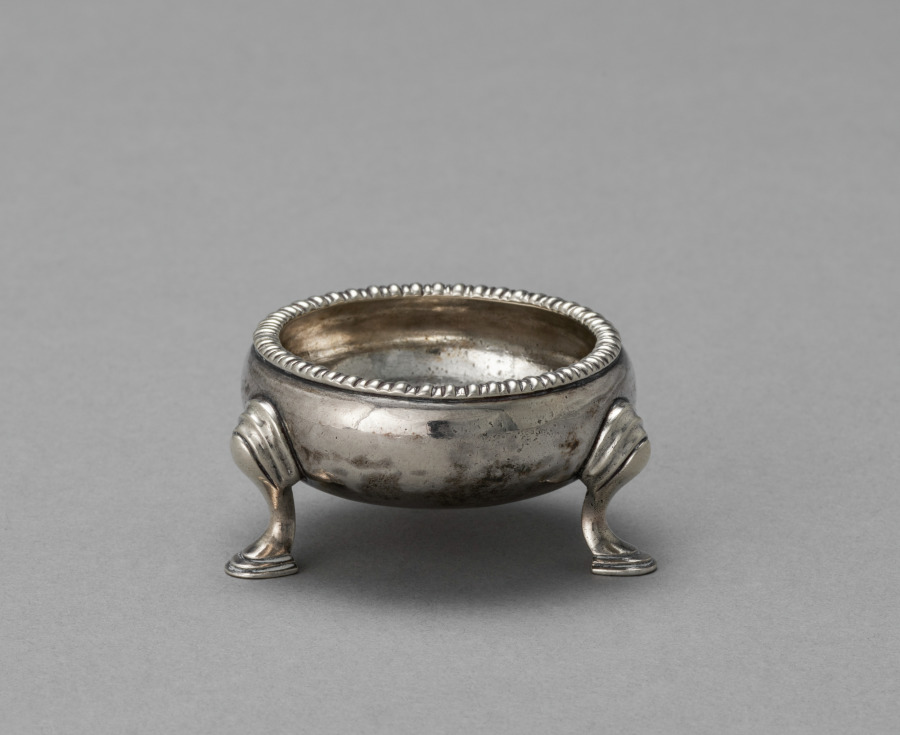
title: Salt Cellar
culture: America, Massachusetts, Salem, 18th century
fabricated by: John Andrew (American, 1747–1791)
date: c. 1770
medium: silver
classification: Silver